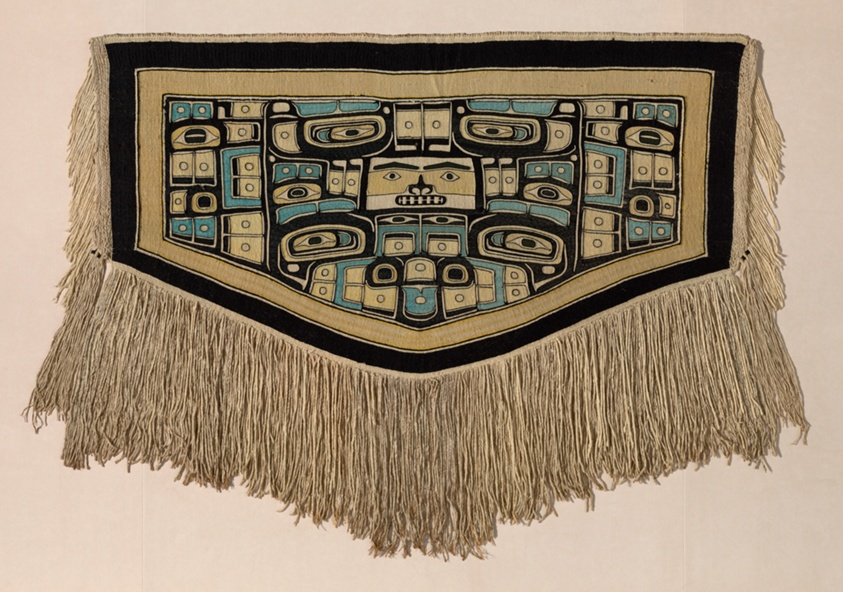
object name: Religious/Ritual Object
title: Dance Blanket with Diving Whale and Raven Motifs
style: chilkat, tlingit, native american, americas, navajo, indigenous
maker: Chilkat Tlingit; Southeastern Alaska, United States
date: Late 19th century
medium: Wool and bark, dovetail and single interlocking, discontinuous weft, alternate pair weft twining; extended float twining, eccentric weft twining, and three-strand weft twining; main warp cut fringe; edges of twill oblique interlacing terminating in cut fringe; additional knotted fringe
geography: Northwest Coast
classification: weaving; ritual objects; art of the americas; textile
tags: animals, supernatural, regalia, dance, raven, bird, whale